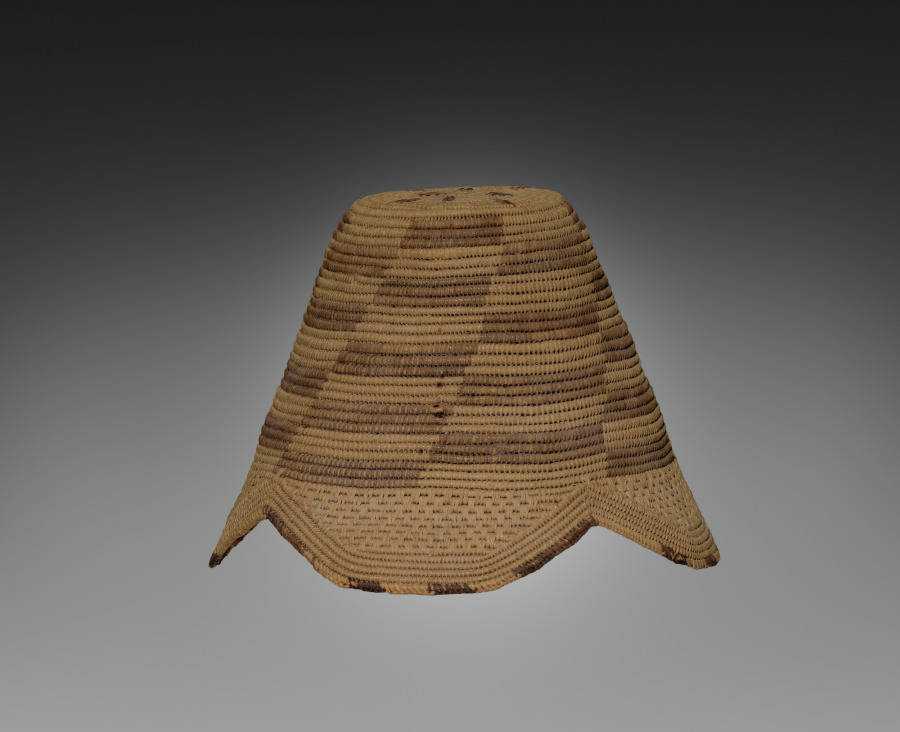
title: Hat (laket)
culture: Africa, Central Africa, Democratic Republic of the Congo, Kuba-style maker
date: early 1900s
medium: Raffia and dye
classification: Garment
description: Titled Kuba men and prominent women wear the laket, a small ornate dome-shaped hat. An essential fashion item of adult men in good social standing, it focuses special attention on the head as a significant marker of individual identity, ethnic affiliation, status, and role in society. This prestige object is secured on the crown of the head with a nine-and-a-half-inch metal pin that pierces through the hat onto a clump of hair. The laket is made from raffia palm fiber coiled into threads and woven in two alternating patterns and contrasting light and dark (dyed) wefts. There are two examples of the laket: the plain type with the flat top, and the more elaborate type called the laket mishiing.